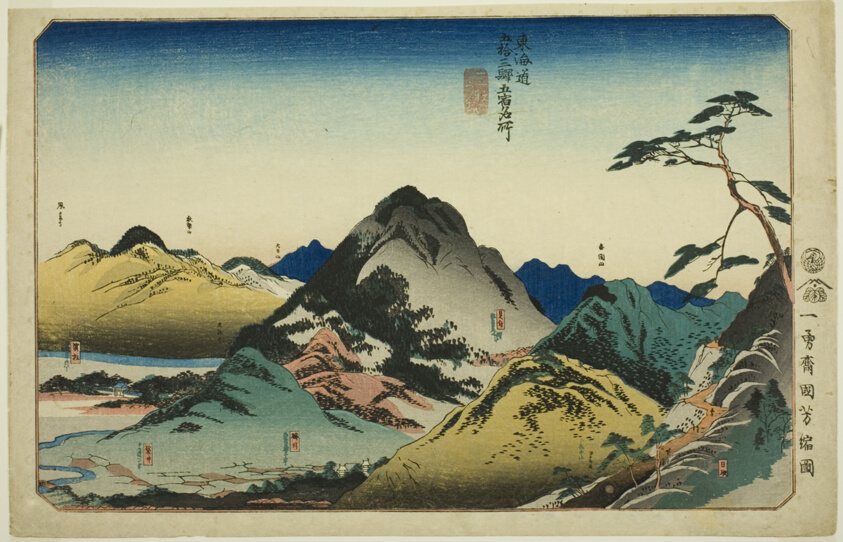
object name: Print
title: Nissaka, Kakegawa, Fukuroi, Mitsuke, and Hamamatsu, from the series "Famous Places on the Fifty-three Stations of the Tokaido, Five Stations (Tokaido gojusan eki goshuku meisho)"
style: Japanese (culture or style)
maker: Utagawa Kuniyoshi (Japanese, 1797-1861)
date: c. 1830/35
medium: Color woodblock print; oban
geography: Japan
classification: woodblock print; print; asian art